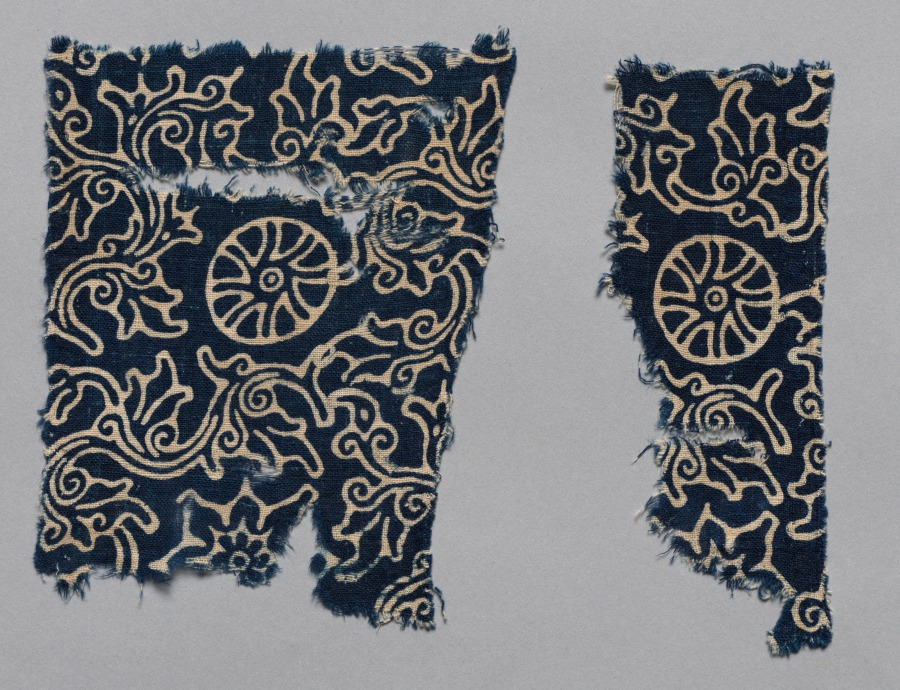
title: Fragments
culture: India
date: 1100s–1300s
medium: plain cloth, resist dyed; cotton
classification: Textile